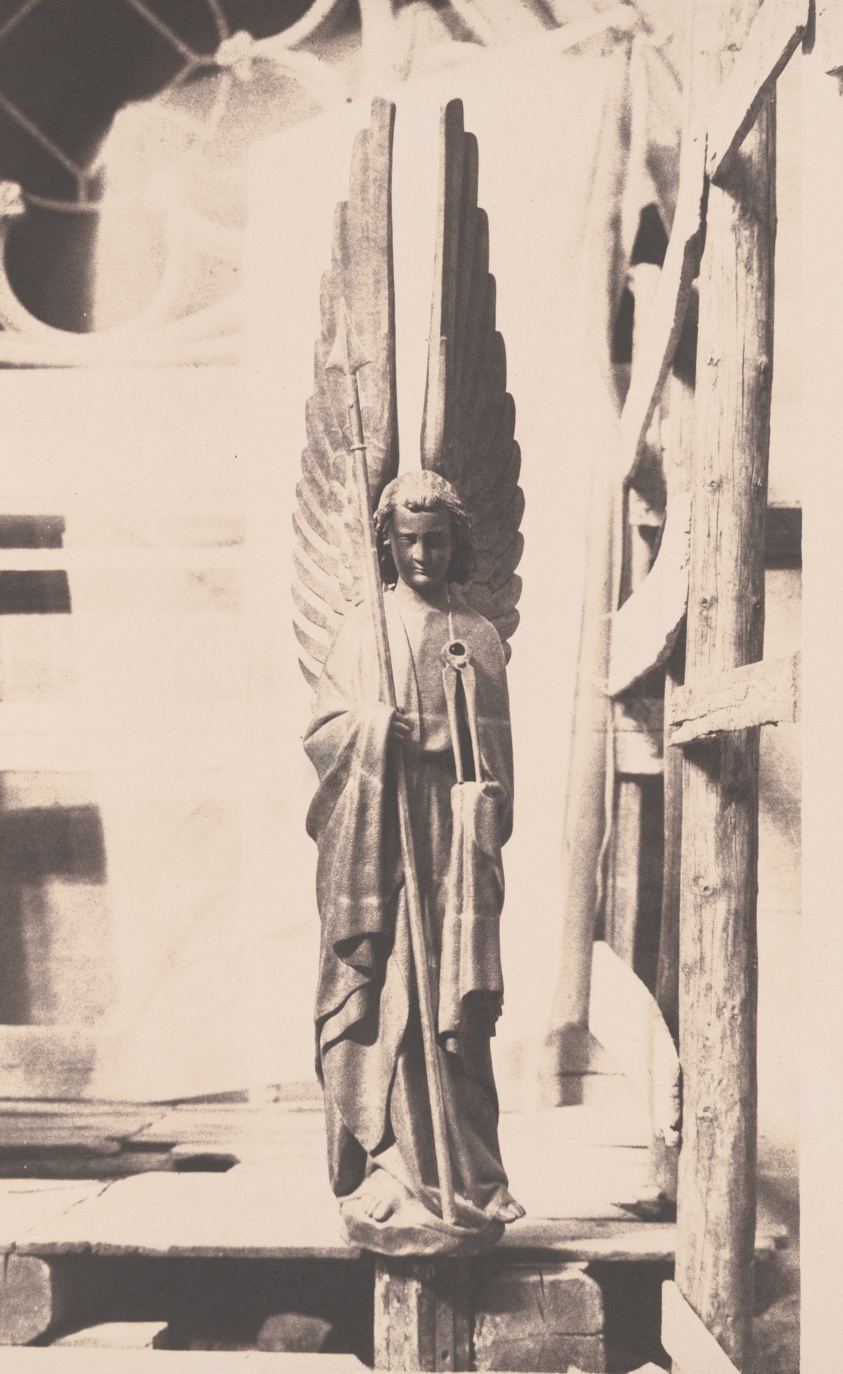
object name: Photograph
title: Angel, Sainte-Chapelle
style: 19th century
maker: Auguste Mestral; French, 1812–1884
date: 1853-54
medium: Salted paper print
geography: France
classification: photography; salted paper print; photographic process; photograph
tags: Paris